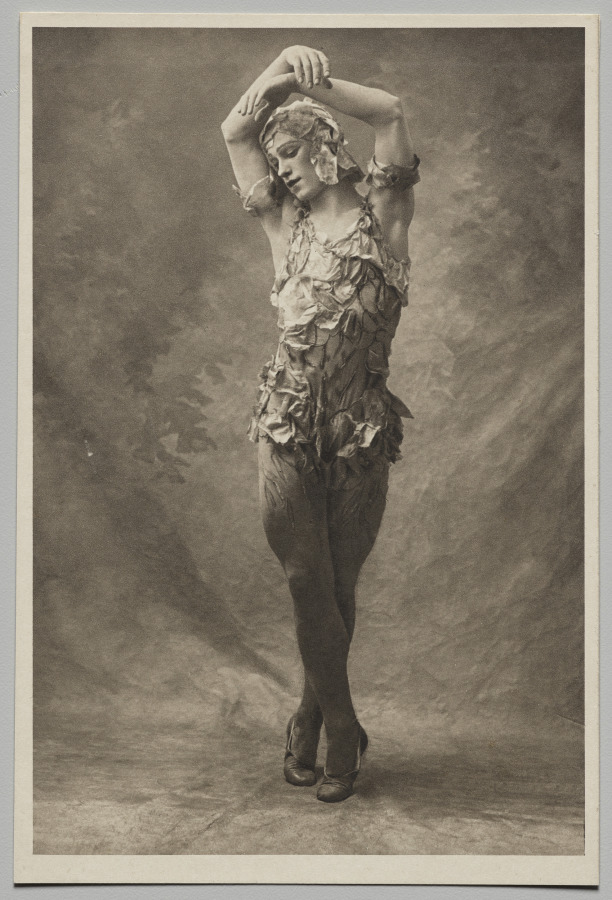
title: Vaslav Nijinsky in Le Spectre de la Rose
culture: France, 20th century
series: Studies from the Russian Ballet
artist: Auguste Bert (French, 1856–before 1945)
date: 1913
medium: Halftone photogravure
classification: Photograph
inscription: Written in pencil on verso: “8M. Nijinsky/Studies from the Russian Ballet/’95”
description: The Phantom of the Rose tells the story of a young woman who returns from her first ball with a souvenir rose. She dreams that the flower becomes a phantom who dances with her, the role played by Vaslav Nijinsky. This ballet became one of the most beloved productions of the Ballets Russes, which toured Europe and North and South America between 1909 and 1929.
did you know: Nijinsky, who played the rose, had to be sewn into his costume covered with silk rose petals for each show.